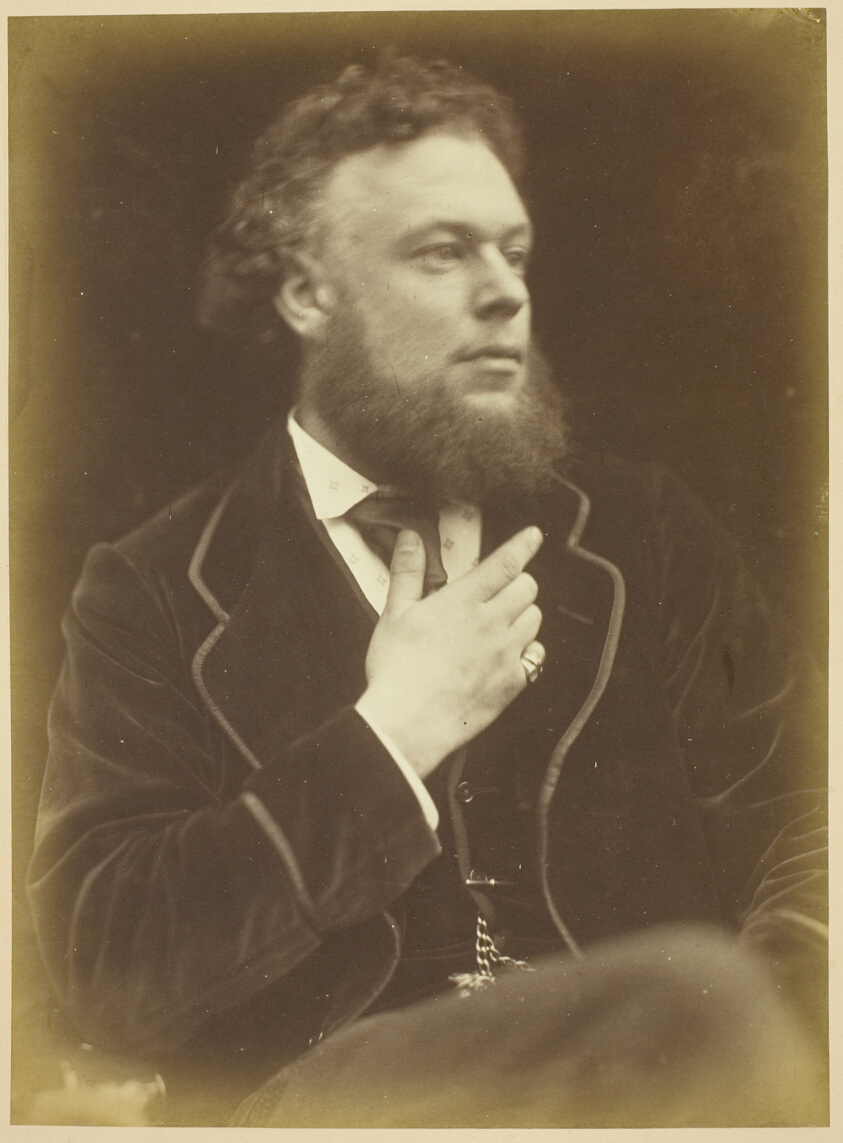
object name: Photograph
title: Unknown Man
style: 19th century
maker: Julia Margaret Cameron (English, 1815–1879)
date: 1868/74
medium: Albumen print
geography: England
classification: albumen silver print; photographic process; photography; photograph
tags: portraits, portraits: male subject, photography